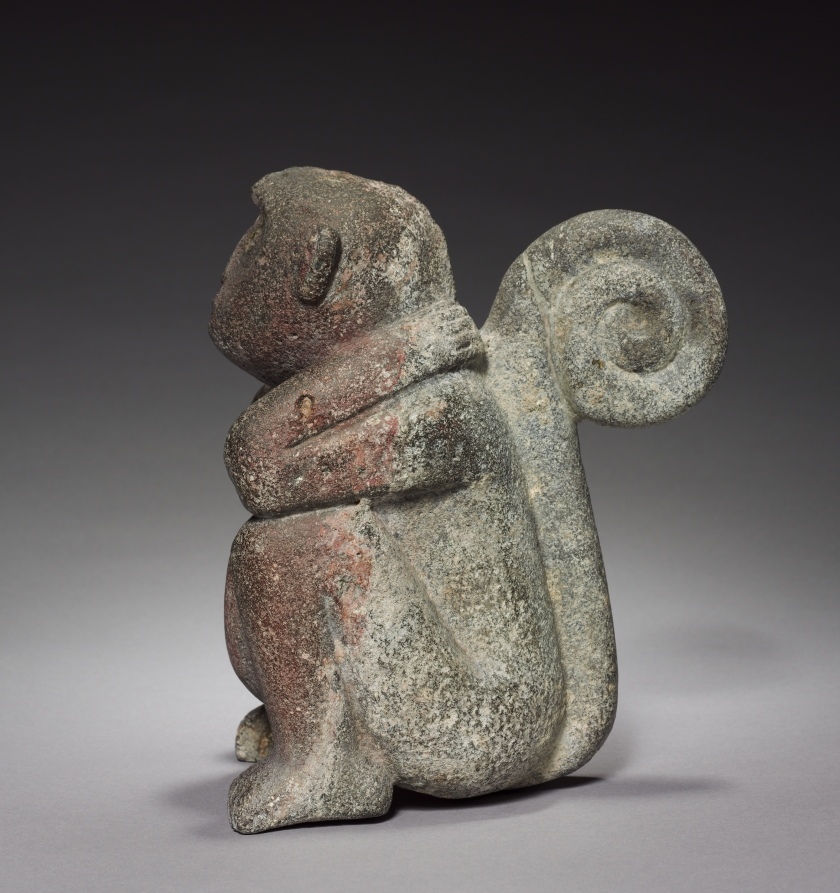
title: Monkey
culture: Central Mexico, Tacuba, Aztec, Post-Classic Period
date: 1325–1519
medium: stone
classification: Stone